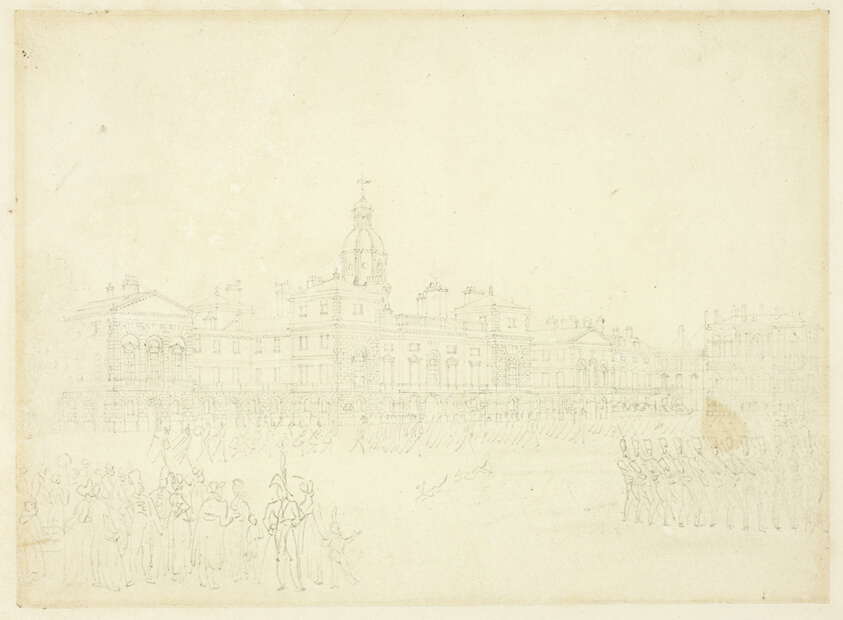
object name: Drawing and Watercolor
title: Study for Mounting Guard, St James Park, from Microcosm of London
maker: Augustus Charles Pugin (English, born France, 1762-1832); Thomas Rowlandson (English, 1756-1827)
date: c. 1809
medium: Graphite on cream wove paper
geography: England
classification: graphite; drawings (visual works); prints and drawing